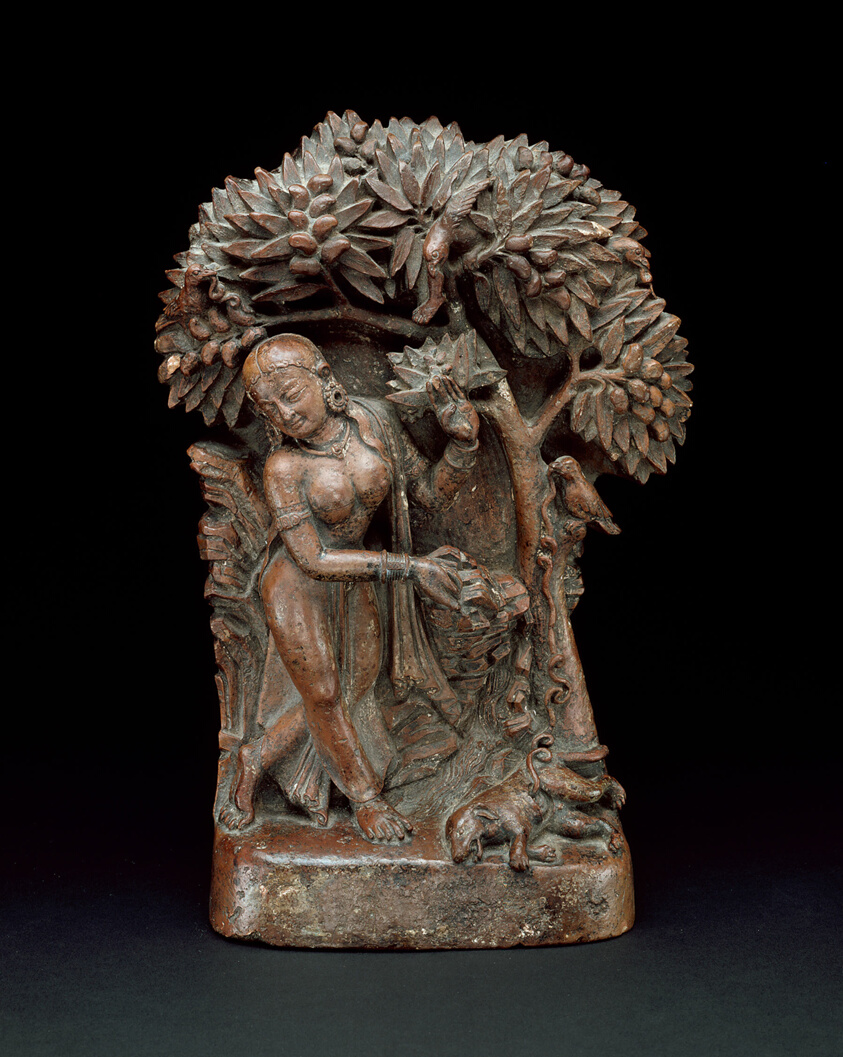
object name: Sculpture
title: Mahasiddha Manibhadra Under a Mango Tree with an Evicerated Dog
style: Himalayan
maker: Nepal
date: 13th/14th century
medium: Terracotta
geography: Nepal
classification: earthenware; ceramics; sculpture; asian art